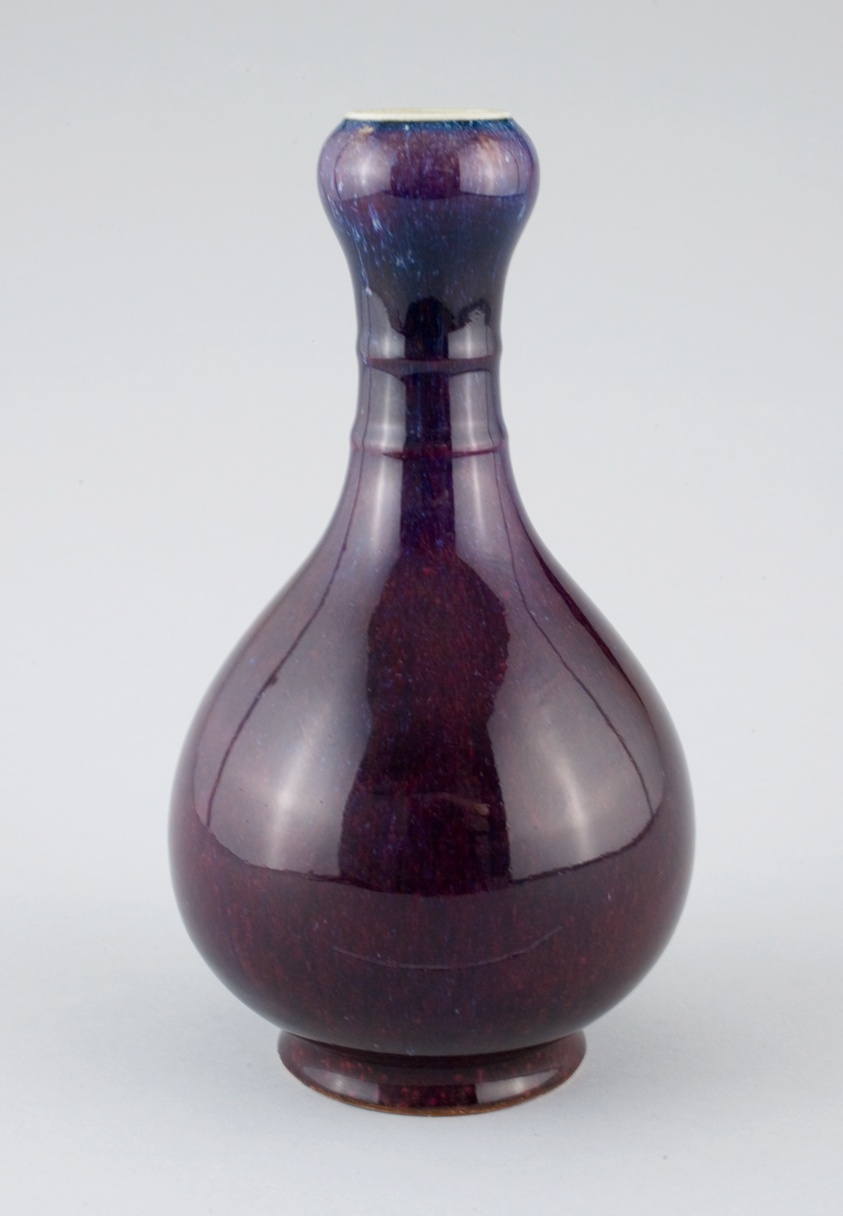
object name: Vessel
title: Garlic-Head Vase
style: Chinese (culture or style)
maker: China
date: Qing dynasty (1644–1911)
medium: Porcelain with dark purple glaze and light blue speckles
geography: China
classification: vase; porcelain; vessel; asian art; ceramics